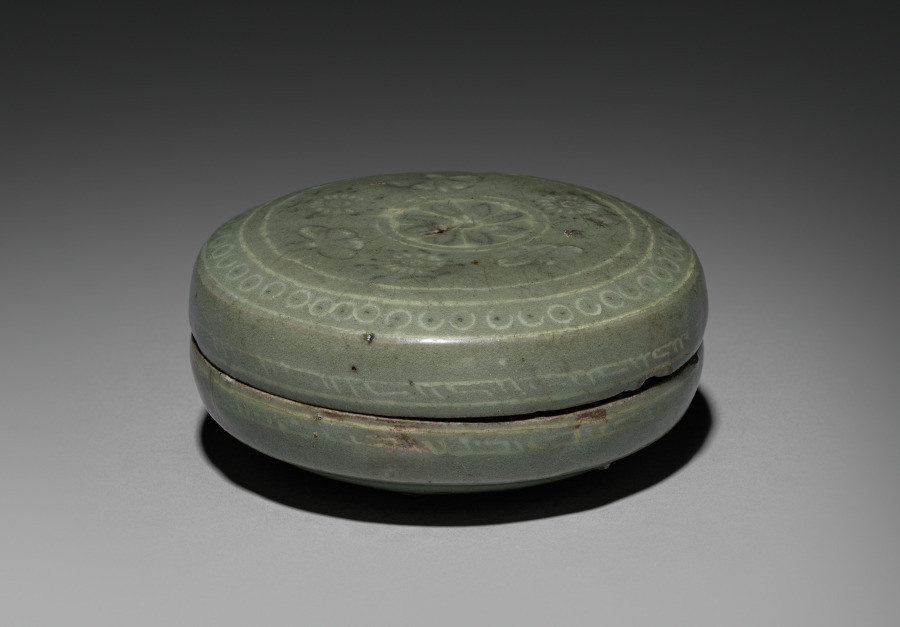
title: Box and Cover with Inlaid Chrysanthemum and Insect Design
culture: Korea, Goryeo dynasty (918–1392)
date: 918–1392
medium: Celadon with inlaid design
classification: Ceramic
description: Celadons, spoons, seals, and bronze mirrors were the most common burial objects in tombs during the Goryeo period (918–1392). Once used to contain colored powder, rouge, and eyebrow gel for makeup, this small container was one of the standard goods that furnished elites' tombs. Both women and men used the grain powder of rice or millet for whitening their skin, safflower extract for rouge, and plant ash or soot for eyebrow gel. Yet, natural-looking make-up seems to have been the most favorable one in Korean according to the travelogue by Xu Jing (1091–1153), the Chinese diplomat who visited Korea in 1123.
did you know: This ceramic container was used to store either incense or cosmetics.